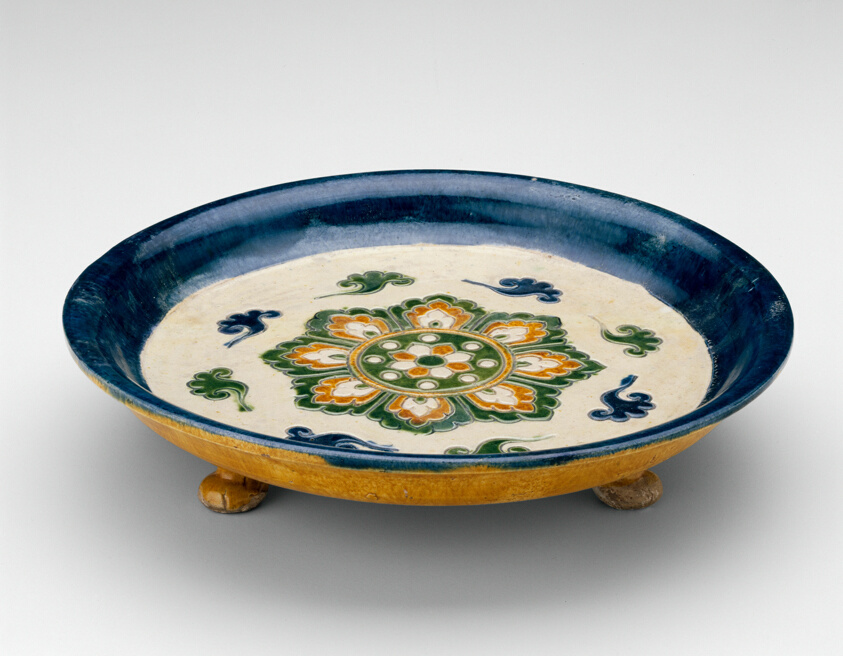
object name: Vessel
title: Footed Dish with Lotus Medallion and Cloud Scrolls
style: Chinese (culture or style)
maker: China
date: Tang dynasty (618–907), first half of 8th century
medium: Earthenware with impressed decoration and three-color (sancai) lead glazes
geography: China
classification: dish (vessel); earthenware; asian art; ceramics; decorative arts